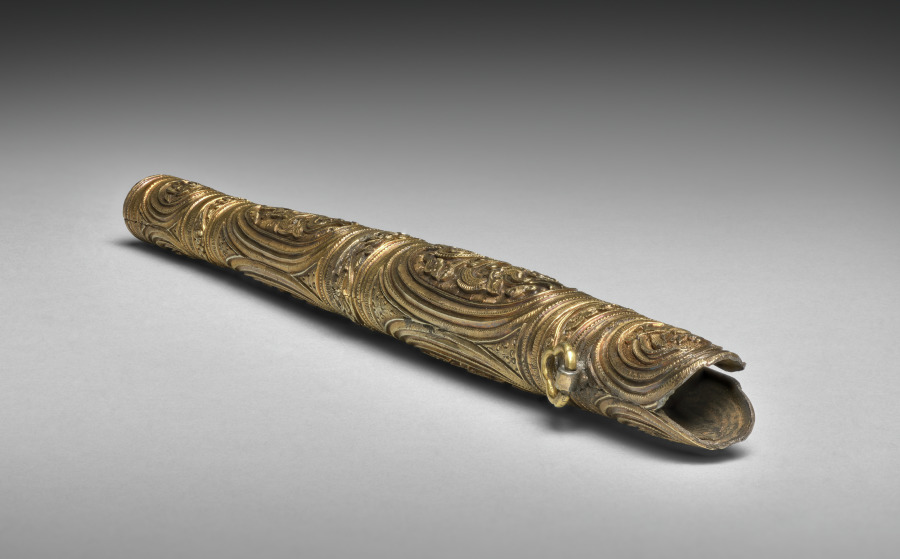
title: Knife Sheath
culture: Korea, Goryeo dynasty (918–1392)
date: 1100s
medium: Gilt silver (body) and brass (trefoil-shaped ring)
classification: Metalwork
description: Made by rolling a flat piece of silver plate, this knife sheath is decorated on each side with oval panels, including two larger middle panels showing an image of rising dragons with ring-punched scales. The circular upper panels bear the image of seated phoenixes. The flat bottom is engraved with a pair of fish, symbolizing harmonious unity. The trefoil-shaped ring attached to the tip of the sheath allows a string to connect it as a pendant to a belt. In medieval Korea, a miniature sheath such as this was considered an important fashion item, especially for elite members of the ruling class.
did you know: This 12th-century silver-gilt knife sheath is meant to be a pendent to a belt as a luxury ornament.